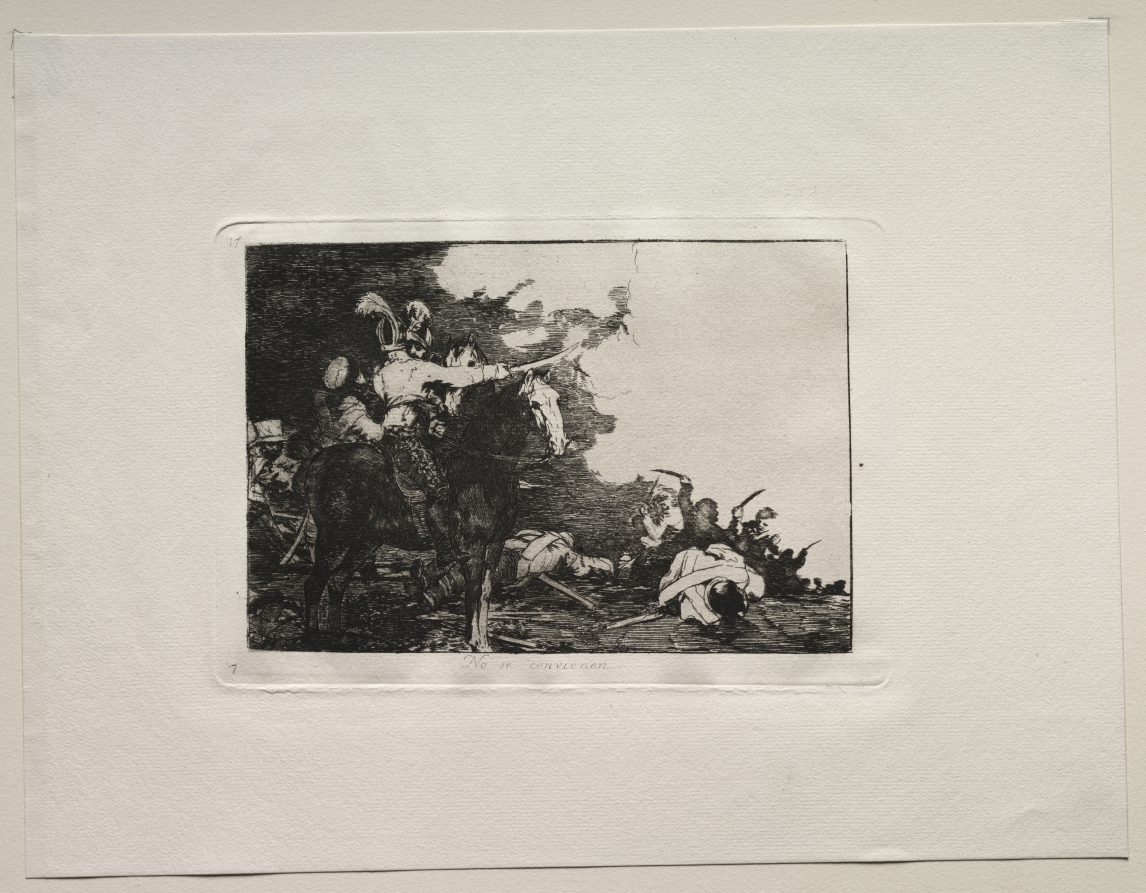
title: The Horrors of War: They Do Not Agree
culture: Spain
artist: Francisco de Goya (Spanish, 1746–1828)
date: c. 1810–20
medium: etching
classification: Print